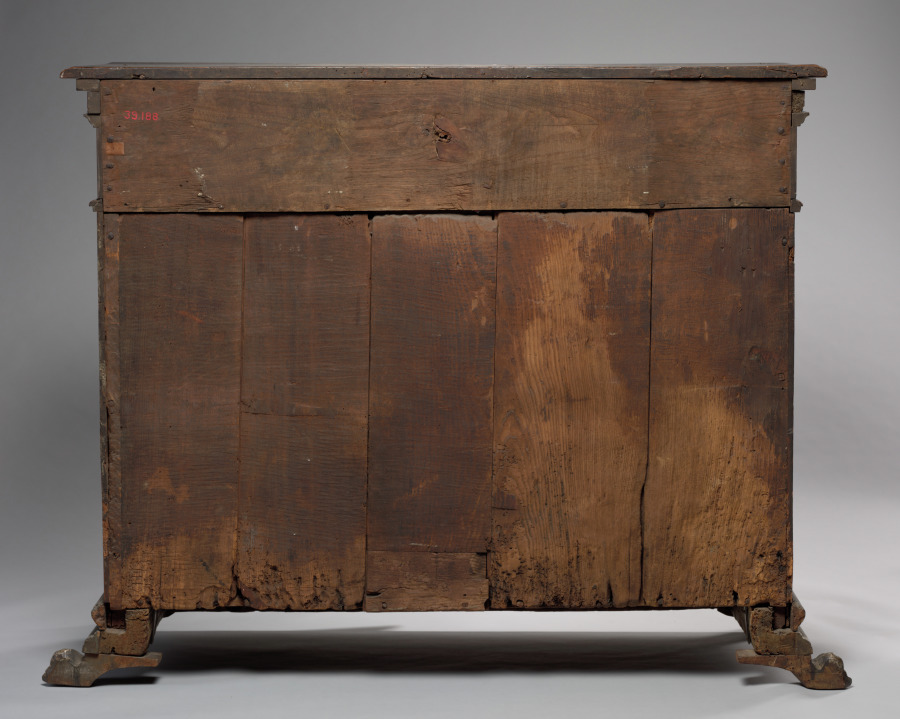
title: Credenza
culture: Italy, Brescia, 16th century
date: mid 1500s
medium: walnut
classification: Furniture and woodwork